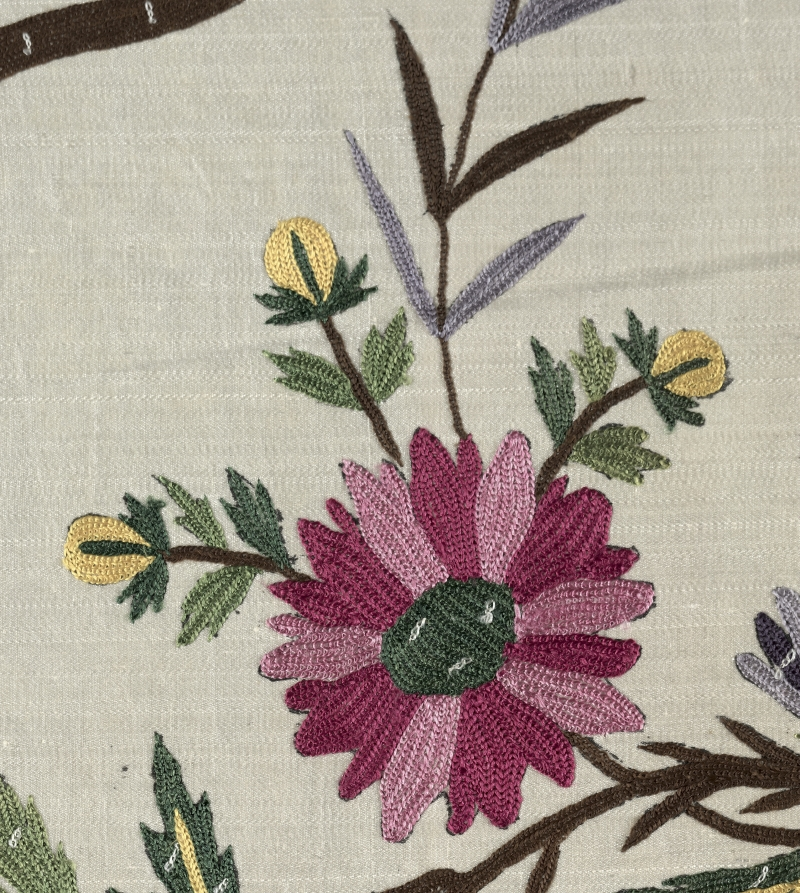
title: Cover (or Hanging)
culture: India, late 19th century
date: c. 1899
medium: embroidery, silk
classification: Embroidery